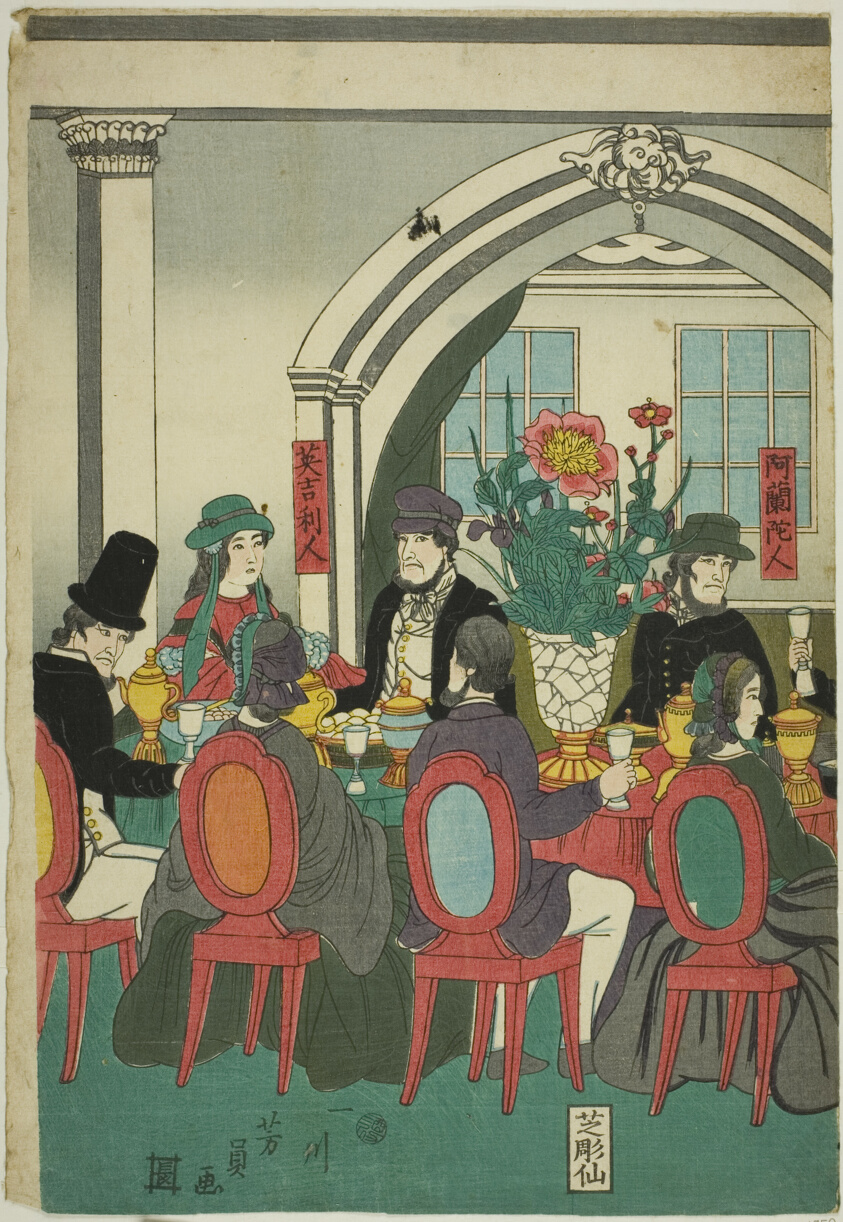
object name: Print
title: Foreigners from Five Nations at a Banquet (Gokakoku ijin shuen no zu)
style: Japanese (culture or style)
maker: Utagawa Yoshikazu (Japanese, active c. 1850-70)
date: 1861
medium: Color woodblock print; center sheet of oban triptych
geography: Japan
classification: woodblock print; print; asian art